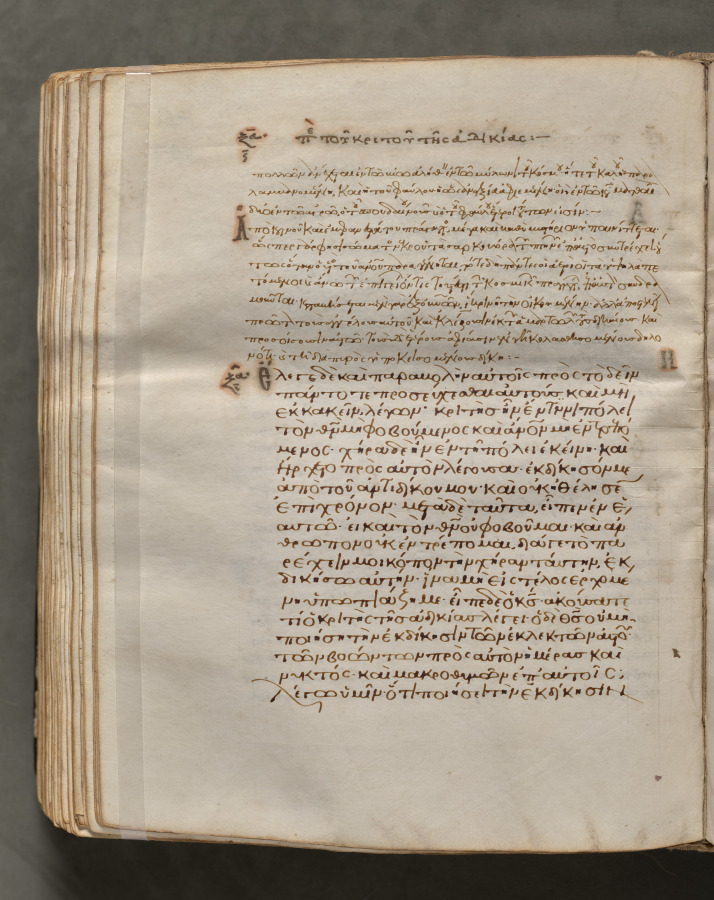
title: Text, folio 289 (verso), from a Gospel Book with Commentaries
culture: Byzantium, Constantinople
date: c. 1000–1100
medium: ink, tempera, and gold on vellum; leather binding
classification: Bound Volume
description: Each of the four gospels in this book opens on a page with brilliantly illuminated borders depicting the author of the text as well as birds—principally peacocks, symbols of the immortality of the soul—and fountains, representing the fountain of life and the salvation of the soul. This volume consists of 428 leaves with texts in Greek. Its level of sophistication suggests that it was probably written and decorated in a monastery in Constantinople.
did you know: Gospel books were carried in procession through Byzantine churches.